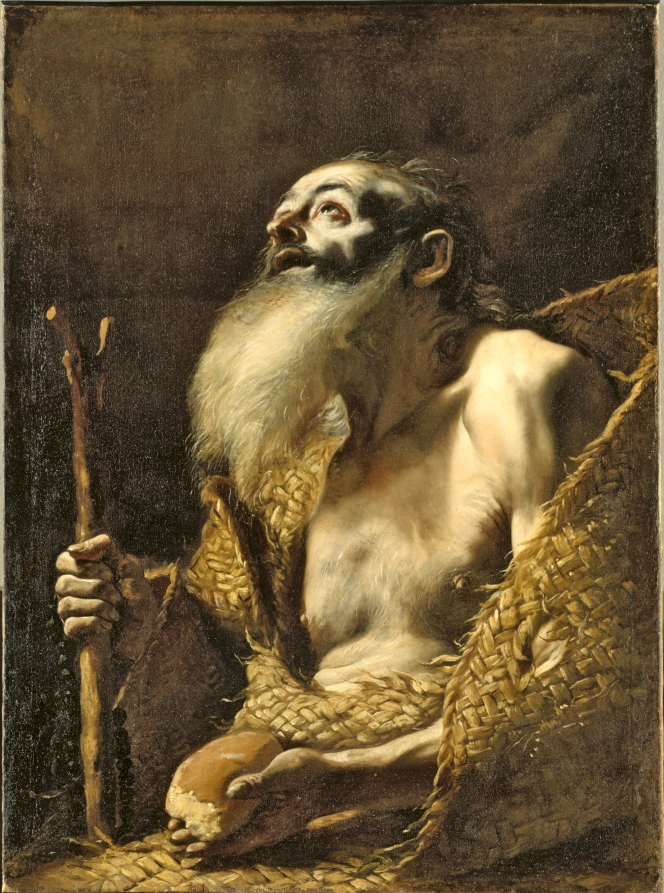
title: Saint Paul the Hermit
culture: Italy, 17th century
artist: Mattia Preti (Italian, 1613–1699)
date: c. 1662–1664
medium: oil on canvas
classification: Painting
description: After training in Rome in the 1630s and 1640s, Preti went to Naples where he continued working in a mode inspired by the work of Caravaggio. In this painting, dramatic lighting and intense naturalism depict the intersection of the heavenly and earthly realms. According to Catholic tradition, Saint Paul the Hermit fled into the desert to escape persecution from the Romans in the third century, and is revered as the first of many hermit saints. A raven brought Saint Paul a half a loaf of bread daily, which enabled him to survive to the age of 113 years. Preti depicted the saint looking heavenward in appreciation and awe of his heavenly provider.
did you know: Clothed only in a rough woven cloth, Paul's suffering drew him spiritually closer to Christ.